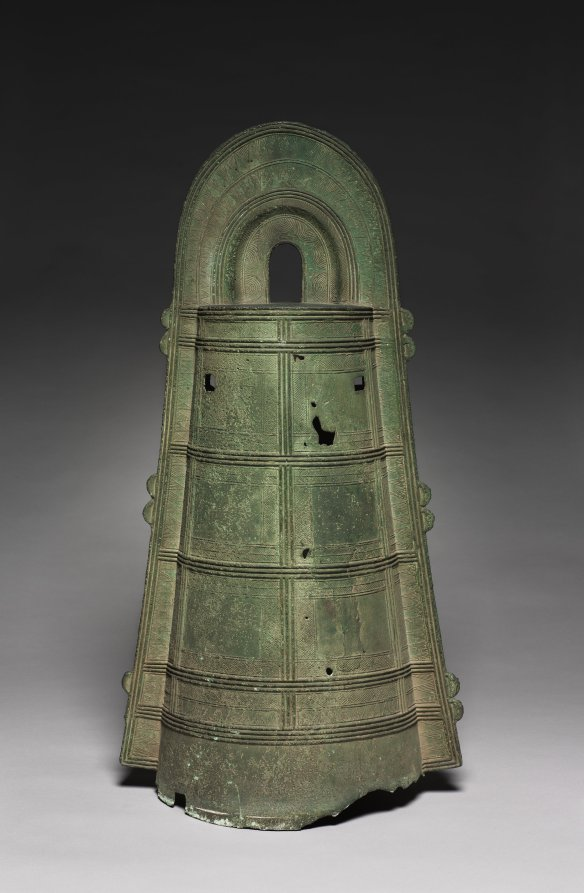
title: Dōtaku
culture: Japan, Yayoi period (c. 300 BCE–300 CE)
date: 100–200 CE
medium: cast bronze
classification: Metalwork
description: The flow of new peoples from Korea to Japan during the Yayoi period brought new technologies of bronze and iron casting. Similarly, the form of the dōtaku, or bronze bell, is thought to have originated in Korea. The original Korean prototypes—stout, thickly cast bells—were transformed in Japan into sculptural forms with sophisticated surface decoration. These dōtaku are often uncovered near burial sites paired with a metal spear or sword nearby, suggesting ceremonial importance.